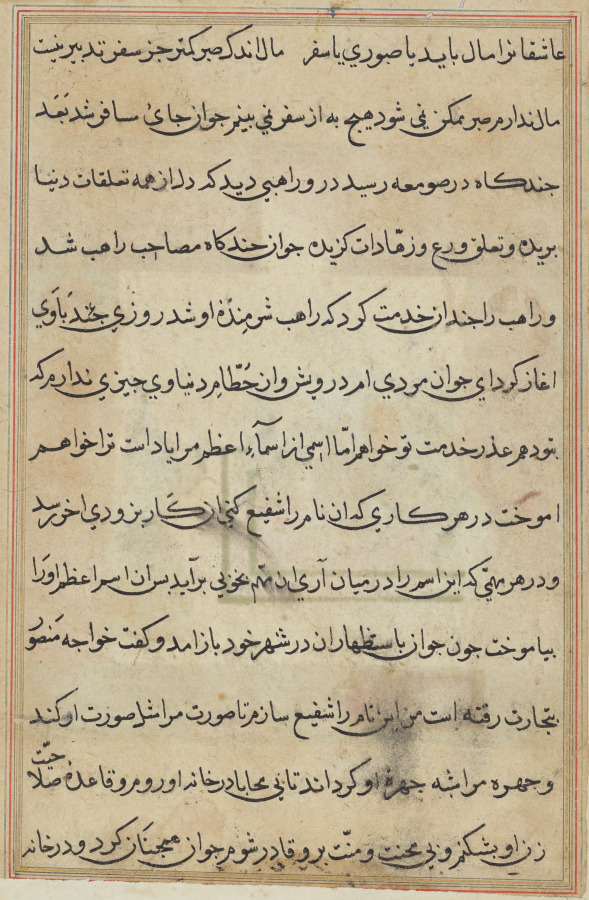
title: Page from Tales of a Parrot (Tuti-nama): text page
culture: Mughal India, court of Akbar (reigned 1556–1605)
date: c. 1560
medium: gum tempera, ink, and gold on paper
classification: Painting